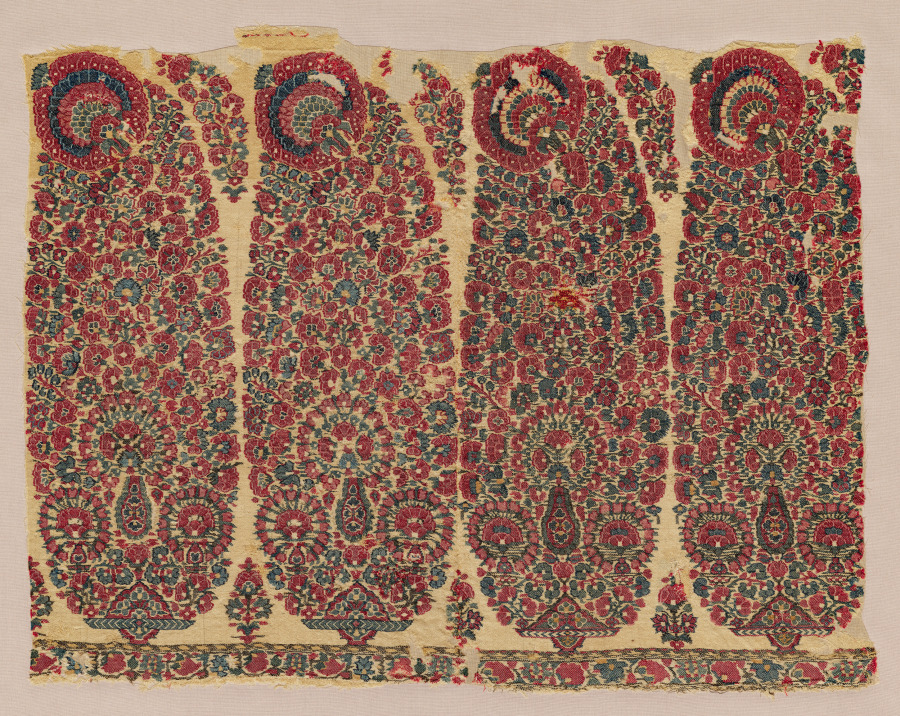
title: Border of a Shawl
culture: India, Kashmir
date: c. 1825–30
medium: wool: tapestry twill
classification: Textile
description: Kashmiri shawls were extremely popular in the early 1800s, especially among foreigners to the Indian subcontinent. Made in the mountainous region of northwest India from wool from mountain goats from nearby Ladakh, the fabrics were especially prized for their softness and their beautiful symmetrical designs, often called paisley in English. This textile fragment was once owned by Ananda Coomaraswamy (1877–1947), a Ceylonese (Sri Lankan) art historian and collector who is credited with introducing South Asian art to museums in the United States.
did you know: The top of the teardrop design recalls fanned-out peacock feathers.